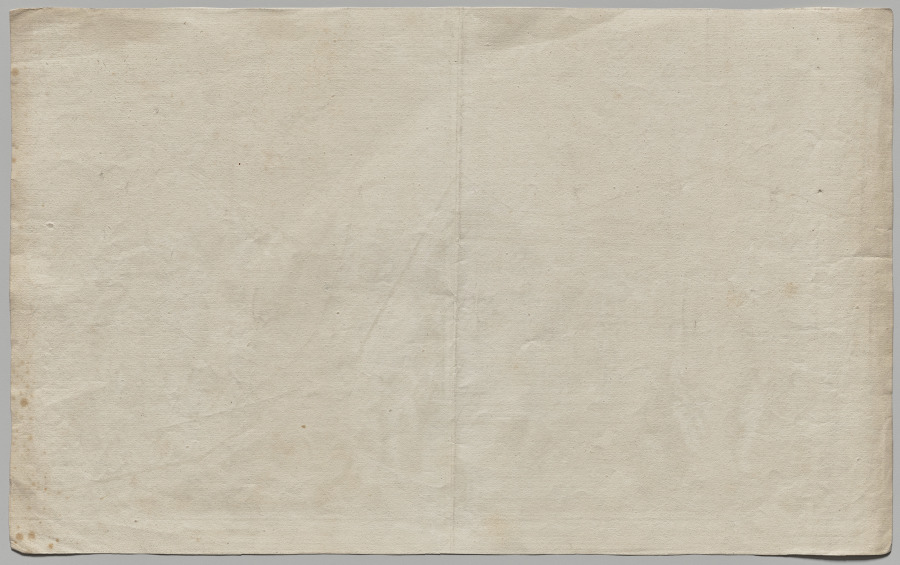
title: Nuova pianta di Roma data in luce da Giambattista Nolli l’anno MDCCXLVII, known as La Pianta Grande di Roma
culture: Italy, 18th century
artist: Giovanni Battista Nolli (Italian, 1701–1756)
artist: Carlo Nolli (Italian, 1690–1790)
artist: Rocco Pozzi (Italian, 1701–1774)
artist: Pietro Campana de Soriano (Italian, 1725–c. 1779)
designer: Stefano Pozzi (Italian, 1699–1768)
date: 1748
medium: etching and engraving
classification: Print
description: The monumental Pianta Grande di Roma, or Large Plan of Rome, which measures about 5 x 7 feet when its twelve plates are assembled, is a landmark in both cartography and printmaking. The map is considered the first scientific rendering of Rome, establishing new standards of accuracy and thoroughness when it was published in 1748. Devised by the Lombard architect and surveyor Giovanni Battista Nolli (Italian, 1701-56), the creation of the map required over ten years of surveying the city carried out by Nolli and a team of assistants with the help of new measuring devices. In Nolli’s “ichnographic” (also called “ground”) plan, architectural features and the urban infrastructure are reduced to a single horizontal slice, a minutely detailed footprint that conveys dimensions, proportions, and orientations to scale with the utmost clarity.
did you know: To make this map, Pope Clement XII granted the mapmaker permission to measure courtyards and other interior, inaccessible spaces in monastic communities, even those in nuns’ convents, which was controversial at the time.